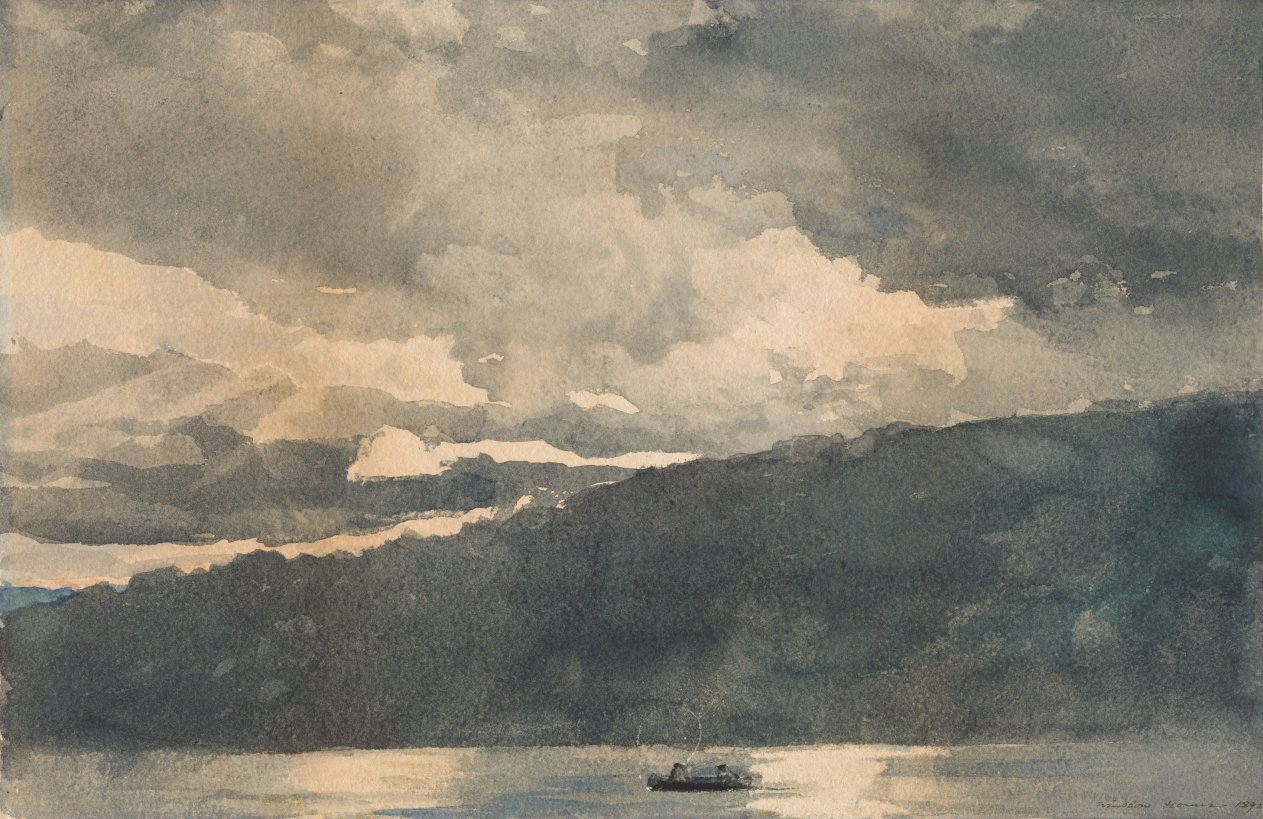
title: Mink Lake, Adirondacks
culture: America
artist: Winslow Homer (American, 1836–1910)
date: 1892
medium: watercolor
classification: Drawing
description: Mink Pond was Homer’s favorite haunt in the Adirondacks. With a subtle range of smoky blue washes, the artist conveyed the grandeur of the mountains and a stormy sky towering above a diminutive canoe with a casting fisherman. Small breaks of brightness provide moments of relief in the monochromatic tonality of the whole.